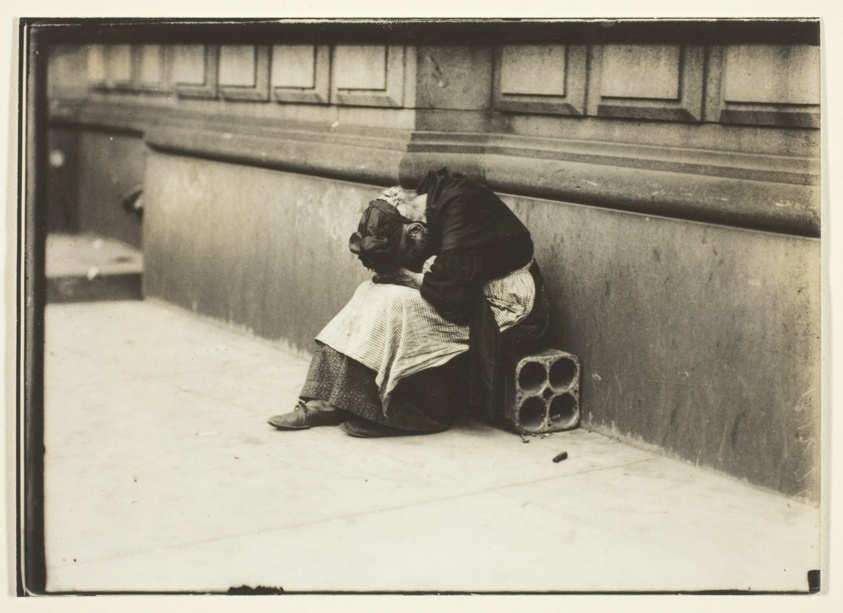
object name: Photograph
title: Untitled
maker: Lewis Wickes Hine (American, 1874–1940)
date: c. 1920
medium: Gelatin silver print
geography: United States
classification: gelatin silver (developing-out-paper) pr; photographic process; photography; photograph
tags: Collected by Hugh Edwards